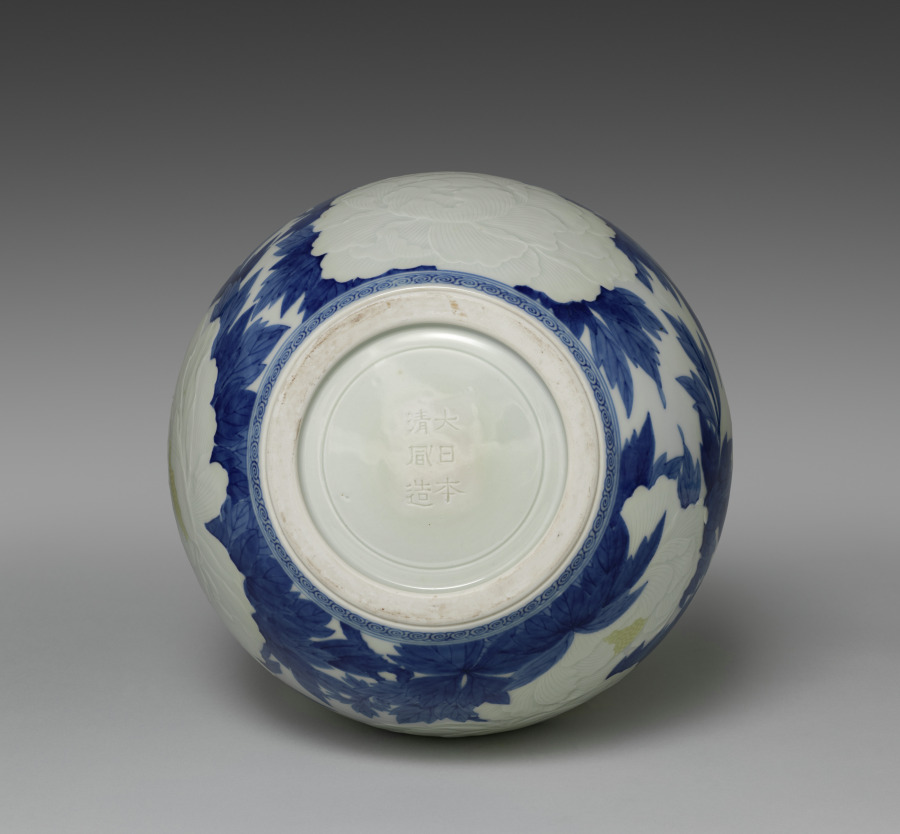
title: Jar with Peonies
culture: Japan, Meiji period (1868–1912)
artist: Seifū Yohei III (Japanese, 1851–1914)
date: 1897–1912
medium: Porcelain with underglaze blue, overglaze color enamel, molded decoration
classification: Ceramic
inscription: 大日本清風造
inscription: 金聲玉振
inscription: 帝室技芸員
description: The petals of the large, white peonies on this jar were made by applying molded clay to the body and incising the clay with lines for definition. The flowers’ centers were then painted with yellow, along with the leaves in cobalt blue line and wash. A subtle blue gradation was also added all around the flowers using a masking method. The lid, with its treasured jewel-shaped finial, was also decorated with foliate motifs in underglaze cobalt blue. Finally, a transparent glaze was applied over the entire body of both the jar and lid. It is a special demonstration of Yohei III’s use of precision and control to create a completely balanced composition.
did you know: Though Seifū Yohei III originally studied painting, he ultimately succeeded his ceramics mentor, Seifū Yohei II (1845–1878), in Kyoto.